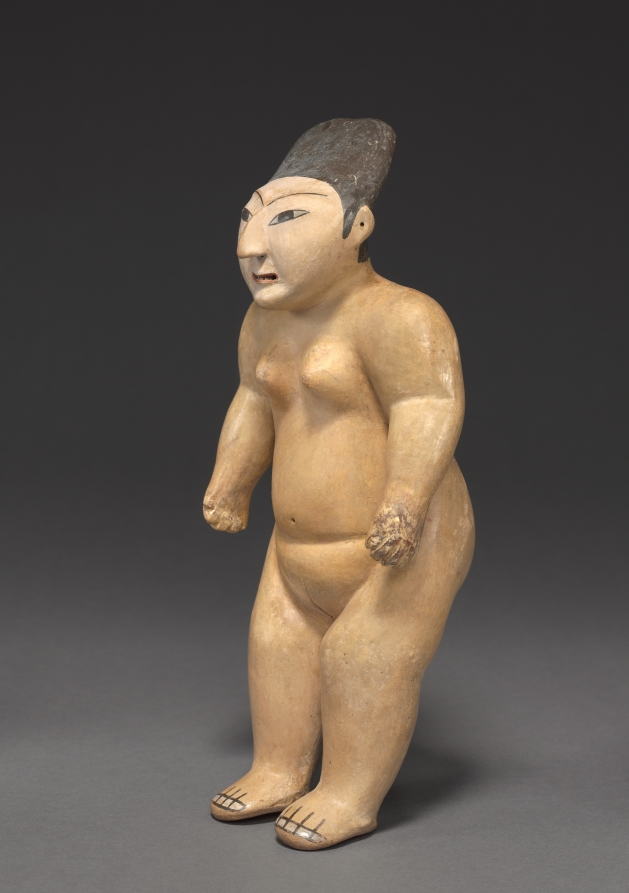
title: Female Figure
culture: Peru, South Coast, Nasca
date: 100 BCE–700 CE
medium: earthenware with colored slips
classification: Sculpture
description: This figure, which may once have worn small garments, might be a tomb offering. Her tapered head reflects the practice of cranial shaping, which may identify her social group and serve as a mark of beauty. Her fleshy hips likely refer to human and plant fertility, since food is the source of such bodily wealth. Her identity is unknown.